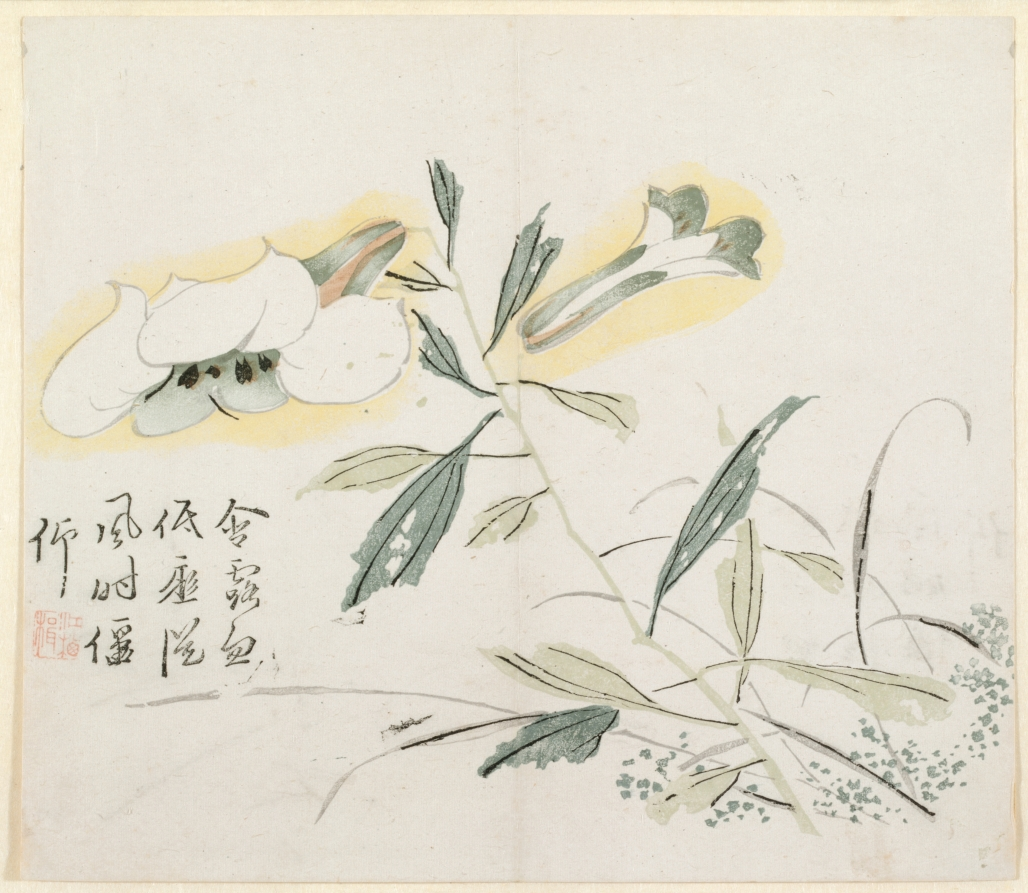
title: Flowering Lily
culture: China, Qing dynasty (1644-1911)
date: 18th Century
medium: color woodblock print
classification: Print